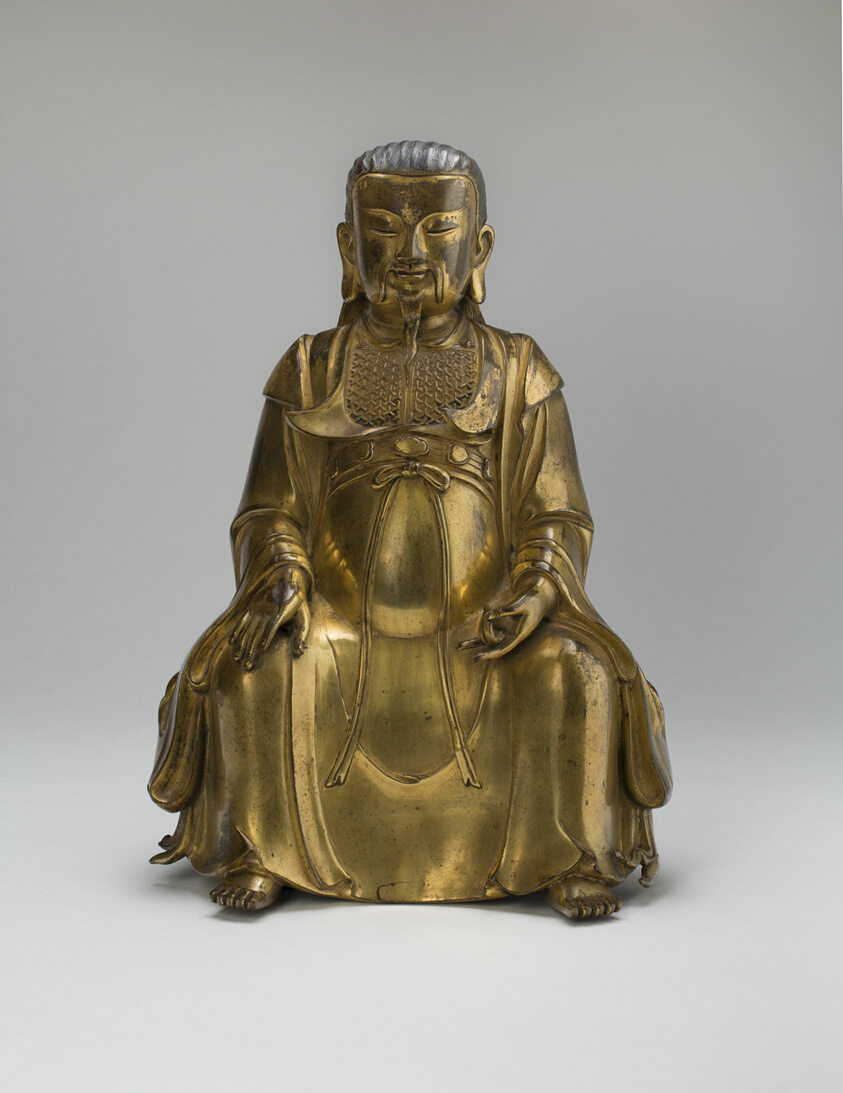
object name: Sculpture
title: Daoist God Zhenwu (Perfected Warrior), Supreme Emperor of the Dark Heaven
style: Chinese (culture or style)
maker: Chen Yanqing （陳彥清）; Chinese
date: Ming dynasty (1368–1644), Zhengtong period (1435–1449), dated 1439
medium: Gilt bronze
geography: China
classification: bronze; metal; sculpture; asian art